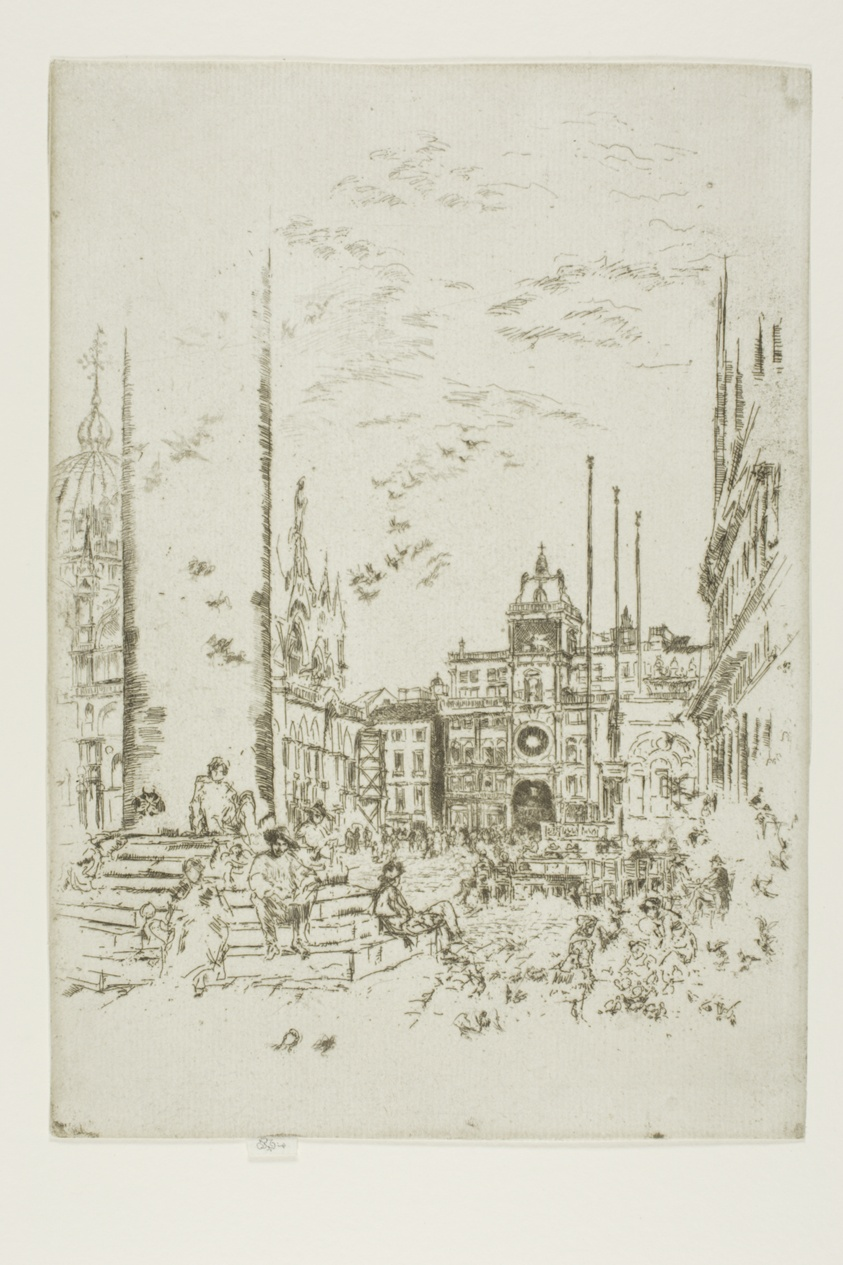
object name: Print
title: The Piazzetta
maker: James McNeill Whistler (American, 1834-1903)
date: 1879/80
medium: Etching and drypoint with foul biting in black ink on light green laid paper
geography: United States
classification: etching; foul biting; print; prints and drawing; paper; drypoint